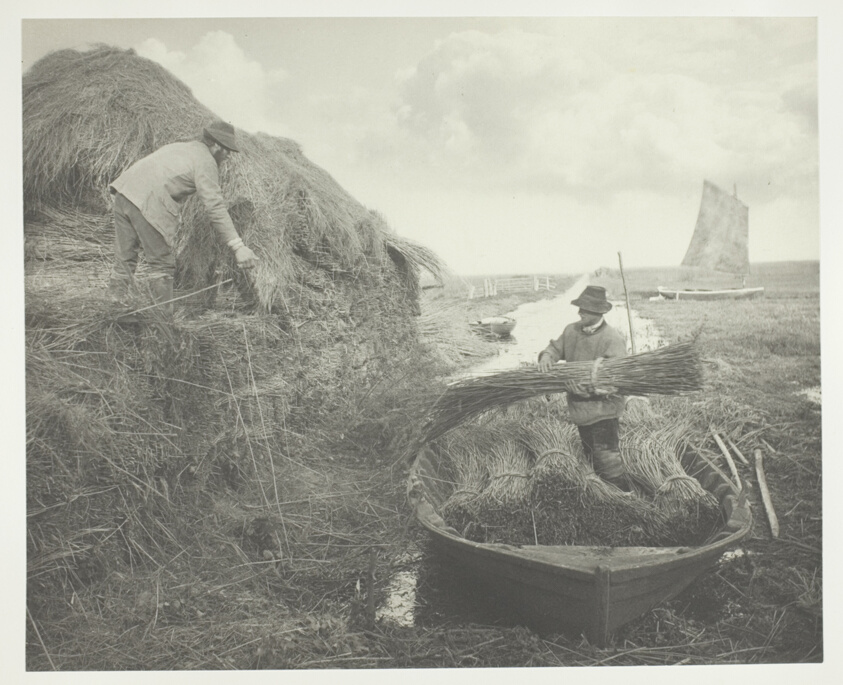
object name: Photograph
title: Ricking the Reed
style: 19th century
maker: Peter Henry Emerson (English, born Cuba, 1856–1936)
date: 1886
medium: Platinum print, pl. XXVII from the album "Life and Landscape on the Norfolk Broads" (1886)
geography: England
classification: platinum print; photographic process; photography; photograph